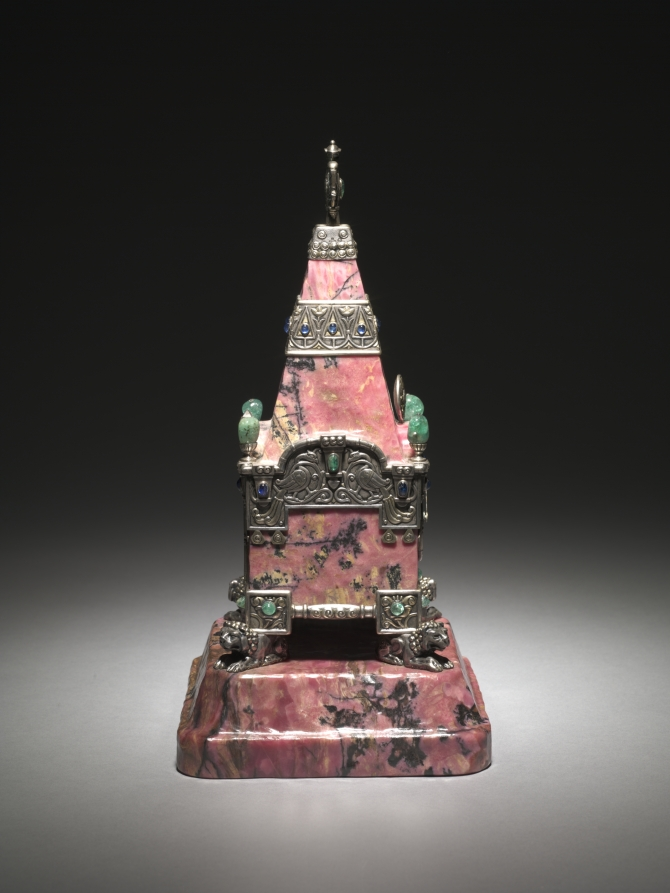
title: Kremlin Tower Clock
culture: Russia, St. Petersburg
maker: House of Fabergé (Russian, 1842–1918)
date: c. 1913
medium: rhodonite, silver, enamel, emeralds, sapphires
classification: Timepiece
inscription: 84, Kokoshnik, delta [assay mark for Moscow, 1908-26]; 91, Kokoshnik; 91; Kokoshnik; C. Fabergé (in Cyrillic); double-headed eagle [imperial warrant]; 16419 k? scratched.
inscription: Painted on clock face: Le Gruet (in script); strike, silence, set hand work (in English).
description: The use of Russian hardstones in creating precious objects became a hallmark of design from the House of Fabergé. Easily carved, these minerals were sourced largely from the western region surrounding the Ural Mountains. Fabergé's workmasters used colorful stones such as agate, nephrite (jade), lapis lazuli, rock crystal, and rhodonite, seen here in this elaborate table or mantel clock, to create all manner of luxurious accessories. Bright pink rhodonite was among the rarest, and consequently most expensive, specimens used by the House of Fabergé. This clock resembles the Taynitskaya Tower, the middle tower on the south side of the Kremlin. The House of Fabergé created this work to commemorate the 300th anniversary of the Romanov dynasty, representing Fabergé's ability to balance the functionality of objects with intricate decorative design.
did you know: The Kremlin tower, which this clock resembles, has a secret well and an underground tunnel that leads to the Moscow River.